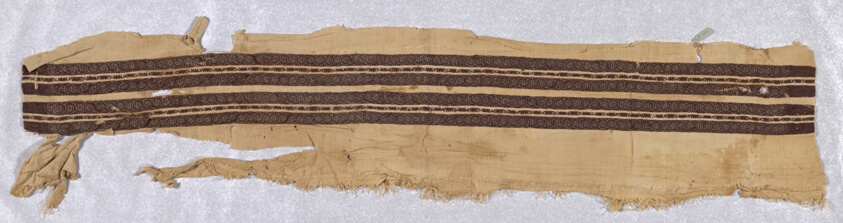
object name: Textile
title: Fragment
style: roman period (egyptian), coptic (period)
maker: Egypt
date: Roman period (30 B.C.– 641 A.D.)/Arab period (641–969)/Fatimid period (969–1171), 3rd/ 10th century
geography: Egypt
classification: textile; weaving